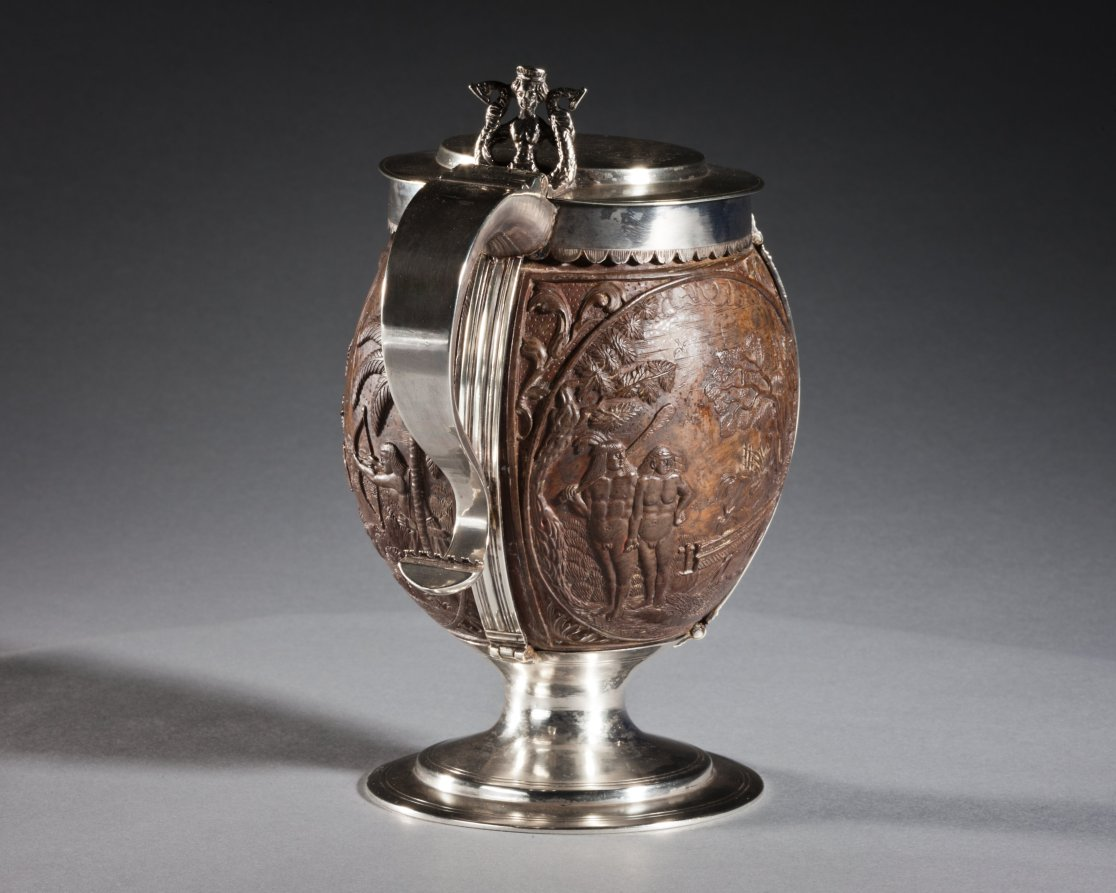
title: Coconut Cup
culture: carved coconut, probably The Netherlands; silver mount, probably England, 17th century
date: c. 1630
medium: carved coconut in silver mount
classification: Metalwork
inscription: top lid has engraved coat-of-arms, underside of lid has inscription: George Lewis TIVERTON Feby, 1st 1760.